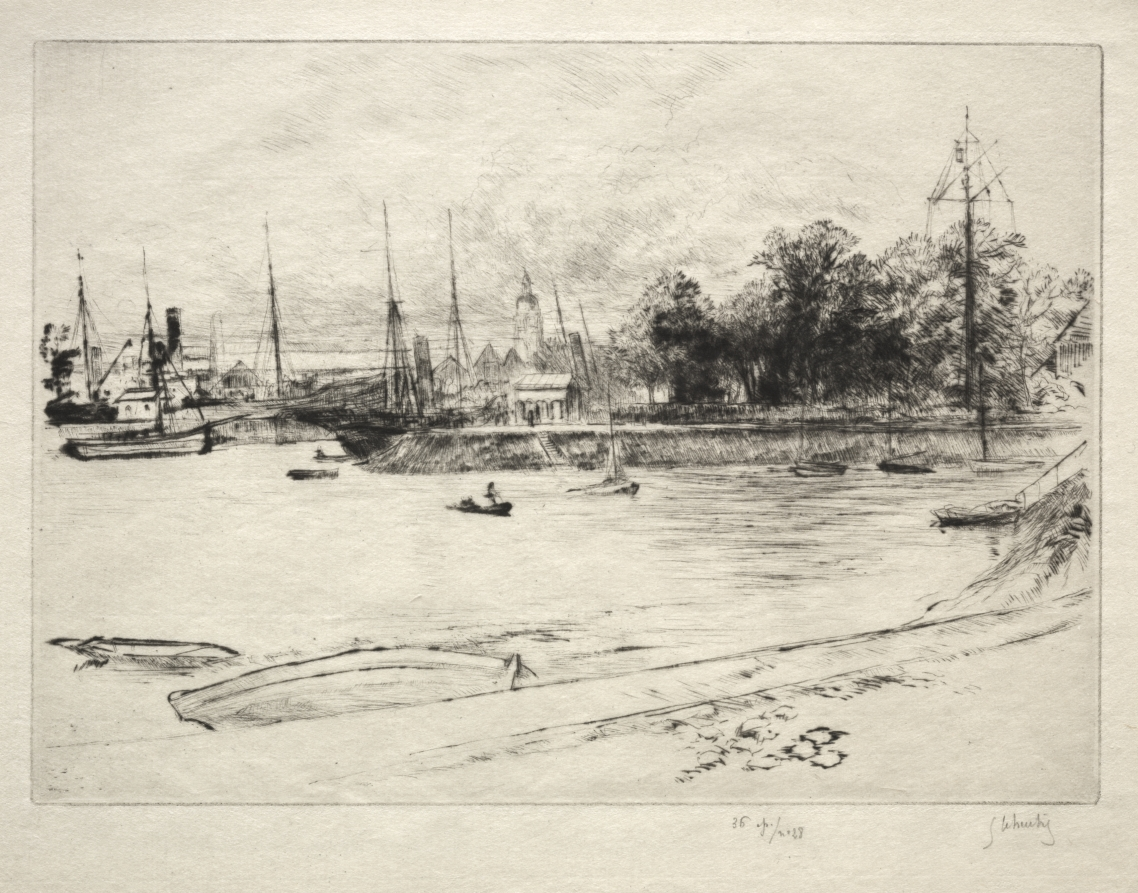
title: Le Jardin du Semaphore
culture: France, 19th century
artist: Gustave Leheutre (French, 1861–1932)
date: 1925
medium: drypoint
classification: Print